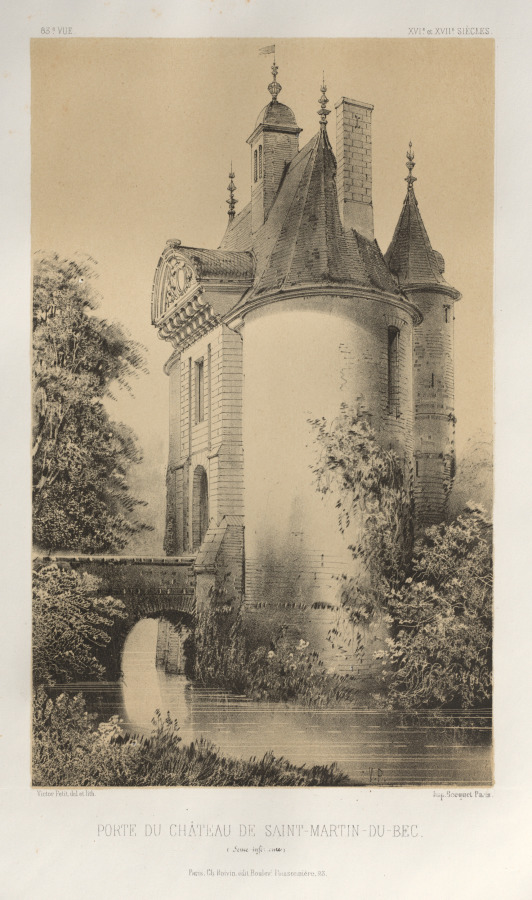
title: Architecture Pittoresque ou Monuments des XVeme. Et XVIeme. Siecles: Chateaux de France des XV et XVI Siecles: Pl. 83, Porte du Château de Saint-Martin-Du-Bec (Seine Infèrieure)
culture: France, 19th century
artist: Victor Petit (French, 1817–1874)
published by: Charles Boivin (publisher and editor); Lith de Godard a Paris (printer)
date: 1860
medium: lithograph with tint stone, from portfolio of 100 lithographs with tint stone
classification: Print